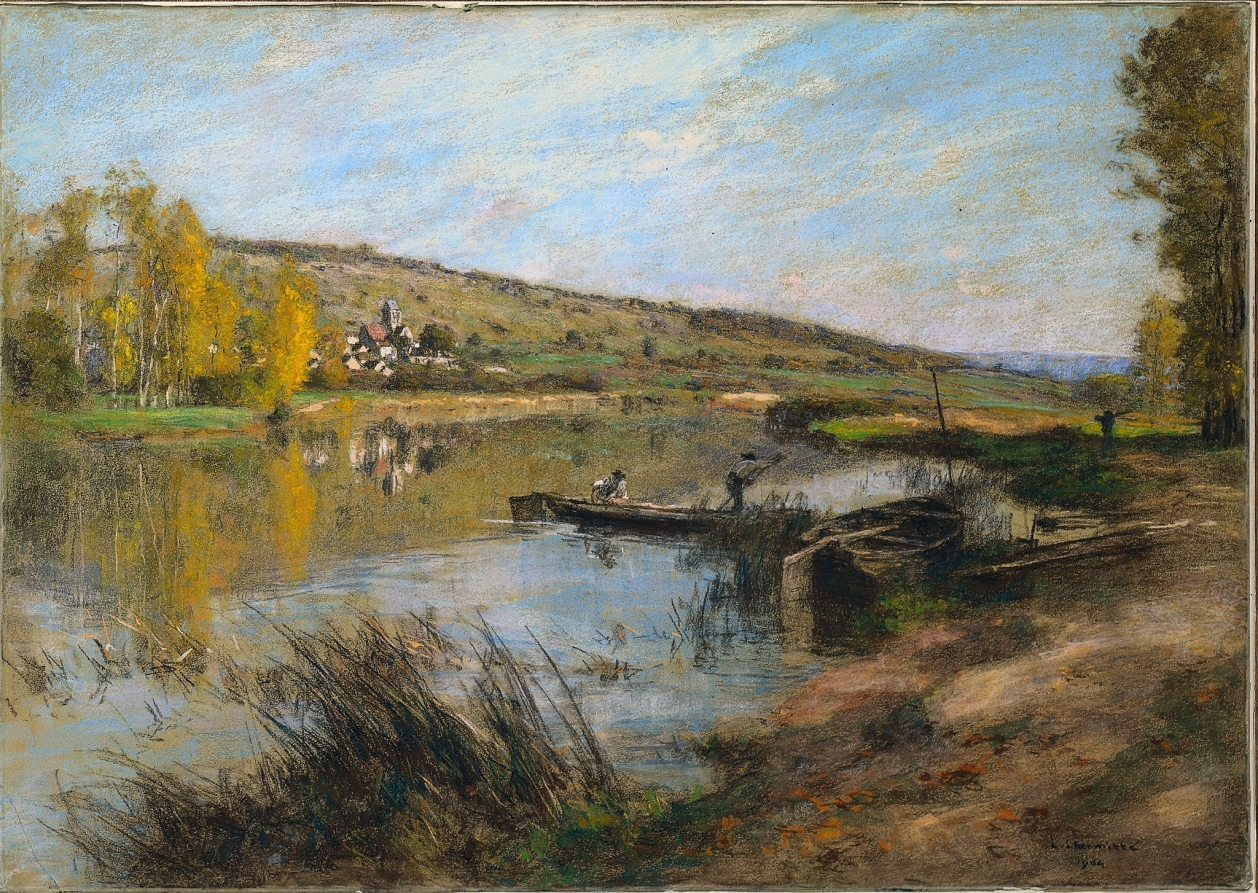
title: Quai au Sable, Chartèves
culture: France, 20th century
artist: Léon Augustin Lhermitte (French, 1844–1925)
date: 1904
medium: pastel on gray wove paper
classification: Drawing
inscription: inscribed, lower right, in black pastel: L. Lhermitte / 1904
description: Like many of Léon-Augustin Lhermitte’s pastels, this drawing shows the Marne River in northeastern France. Such artworks were created both because of the artist’s attraction to the subject and due to their marketability. Drawing from memory, Lhermitte worked in his studio, producing a complex range of marks with pastel crayon on densely textured paper and even manipulating the powdery material with brushes and sponges. Although his comparatively traditional style did not align with artistic movements of his time, it was hugely popular around 1900—especially in the United States, where the hardworking laborers that populated his landscapes appealed to industrialist collectors.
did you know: Lhermitte received a stipend from his hometown Mont-Saint-Père to study in Paris.